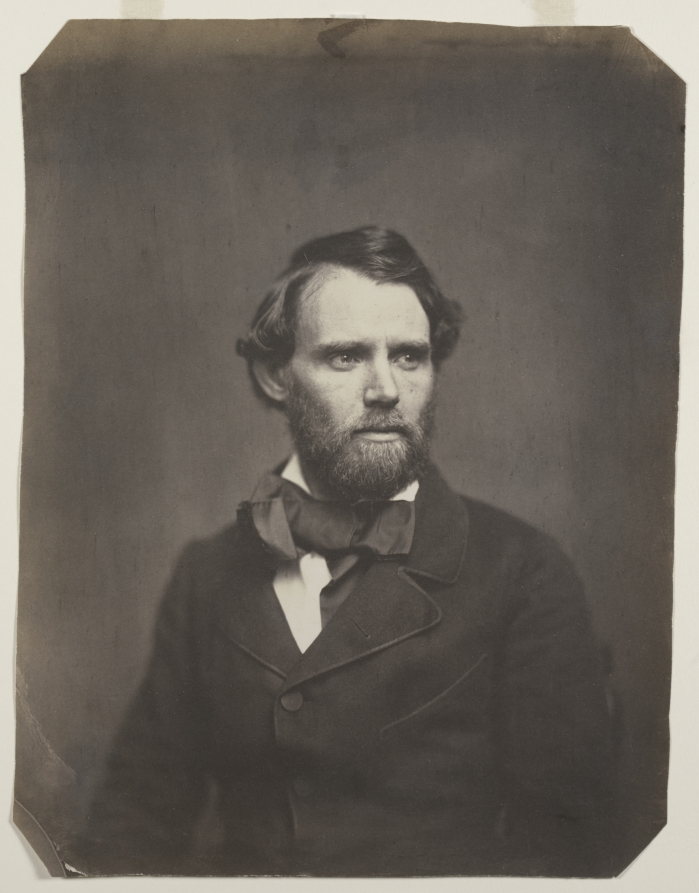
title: Senator George Ellis Pugh of Ohio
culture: America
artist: attributed to Whitehurst Studio (American)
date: c.1857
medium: salted paper print from wet collodion negative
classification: Photograph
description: Photographing prominent politicians or other celebrities was an effective advertisement for the quality and prestige of a portrait studio. Whitehurst Studio opened in 1849 and soon had galleries in 12 cities, including Cincinnati, producing 30,000 daguerreotypes a year. In 1857 its Washington branch advertised it had photographed the entire Congress. To outflank competition from cheaper operators, Whitehurst, in1854, became a pioneer in America in the production of paper photographs. This is a rare example of an American salted paper print, one of the early paper print processes quickly succeeded by albumen prints. Pugh, a Cincinnati lawyer, represented Ohio in the US Senate from 1855 to 1861.